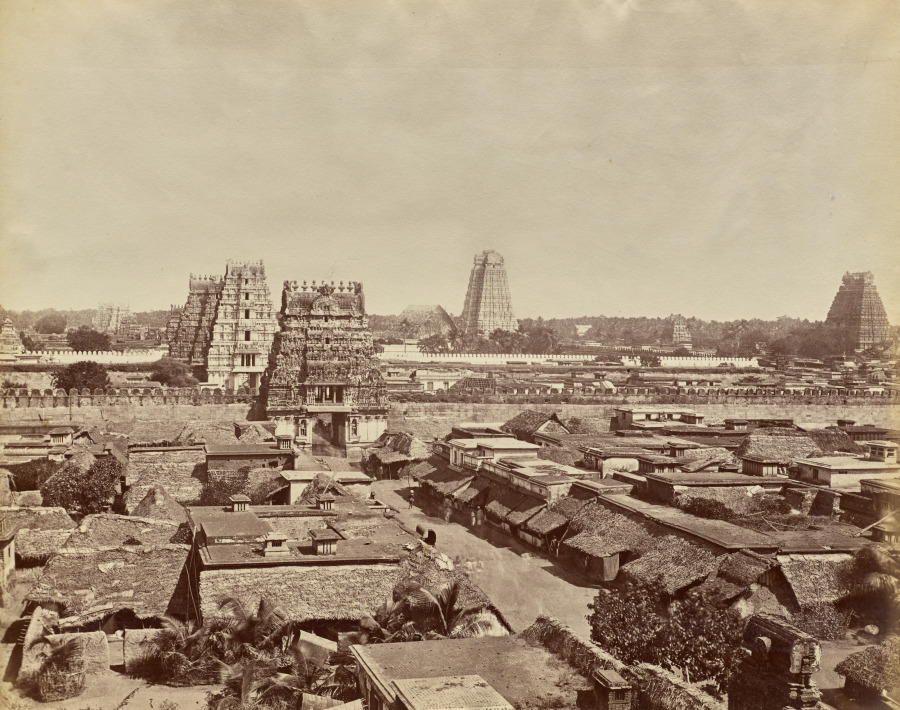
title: View from the Top of the Rock, looking over the native Town, Trichinopoly, India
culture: India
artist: Nicholas & Co. (British, active India, 1873–1905)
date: 1878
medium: albumen print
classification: Photograph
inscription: Embossed stamp at bottom right: "Nicholas & Co. Madras"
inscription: Written in graphite on verso: "71 Sheeruu Guru General View (?)"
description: The Ranganathaswamy Temple, dedicated to the god Vishnu, originated in the 1st century CE and is still active today. This view sets the gopura (temple entrance towers) in their urban context and juxtaposes the vast scale of the complex against the much humbler buildings where the Indian population lived and worked. To see carvings inside the temple complex, look at 2015.37 in the collection.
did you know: The towers in the background mark the largest temple compound in India, which occupies 156 acres.